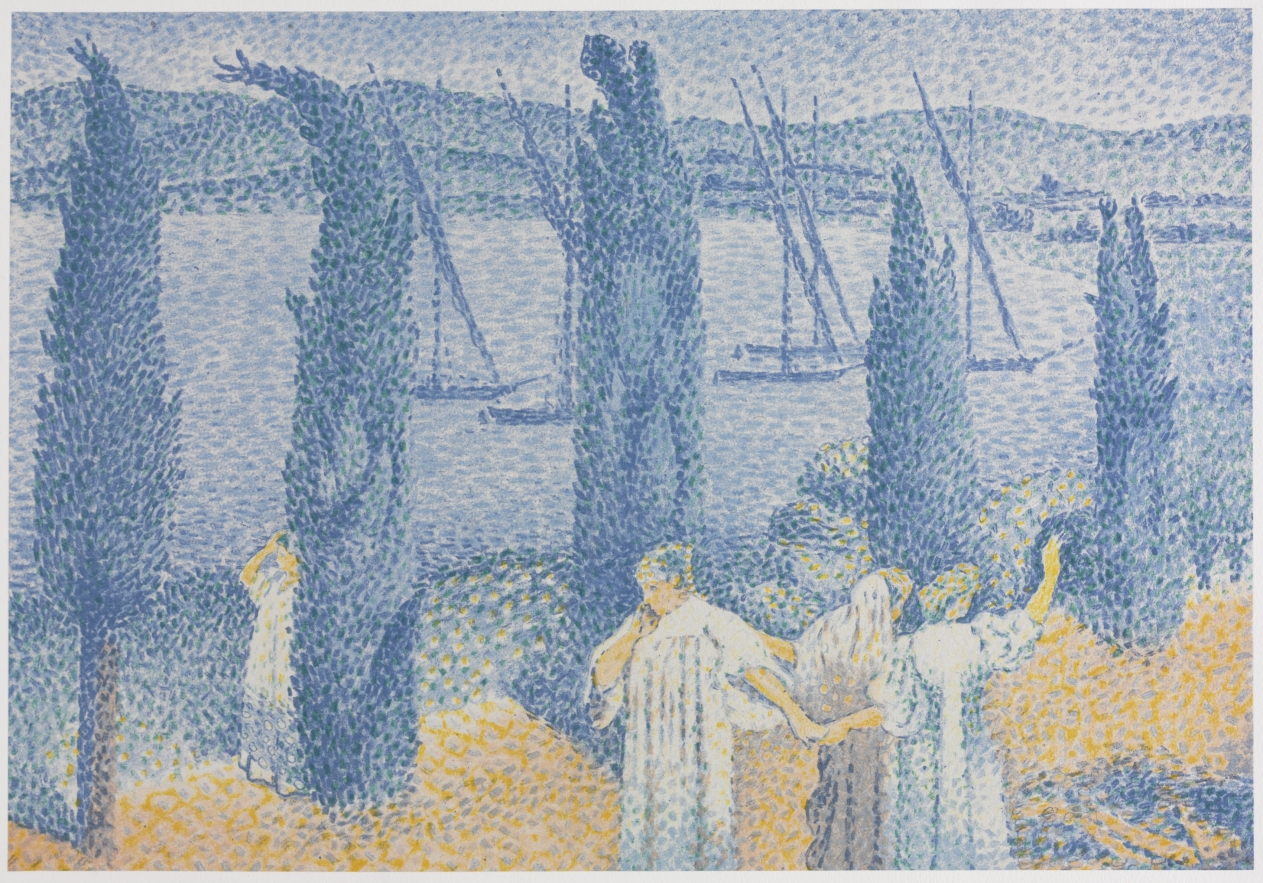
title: The Promenade (Landscape with Cypresses)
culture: France, 19th century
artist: Henri-Edmond Cross (French, 1856–1910)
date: 1897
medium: color lithograph on chine collé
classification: Print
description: In 1891, Henri Cross began painting in a pointillist style influenced by Georges Seurat and Paul Signac. He also left Paris and moved to the south of France, settling in Saint-Clair, a small village near Saint-Tropez. There, he concentrated on seascapes and scenes of peasants in harmony with nature. The sensuous silhouettes of cypresses and the swaying circle of figures by the water’s edge exemplify Cross’s decorative treatment of landscape, also recalling the Japanese color woodcuts and Art Nouveau designs that inspired other neo-Impressionists at the time.